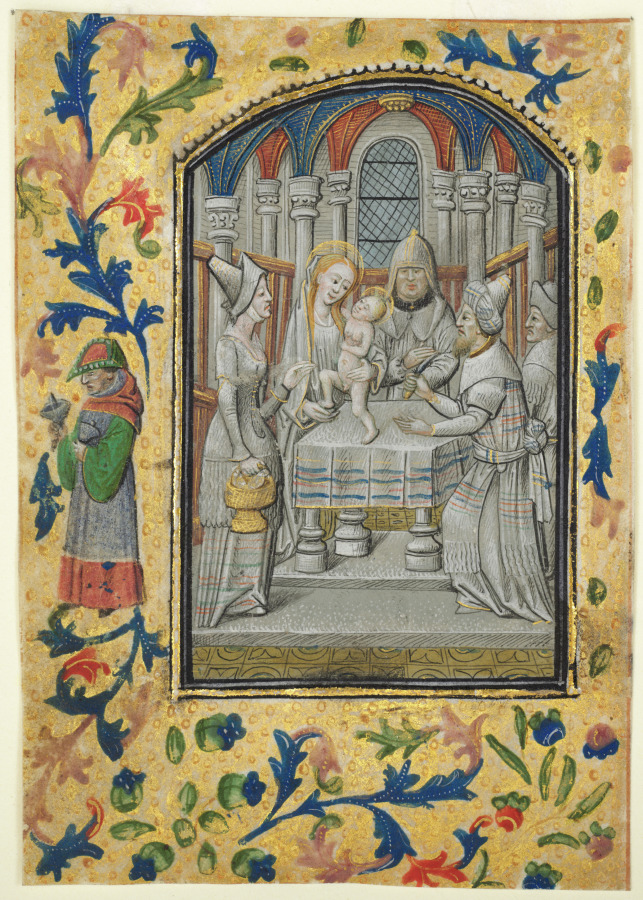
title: Leaf from a Book of Hours: Presentation in the Temple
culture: Flanders, Bruges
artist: Guillaume Vrelant (Flemish, c. 1454–1481)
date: c. 1470–1480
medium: tempera, liquid gold, and grisaille on vellum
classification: Manuscript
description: Guillaume Vrelant, born in Utrecht, was known to be in Bruges from 1454 onward where he died around 1481. He probably went there to sidestep a 1427 law which banned the sale of Utrecht images. A painter very much in vogue, he founded the Illuminators’ Guild in Bruges under the patronage of Saint John the Evangelist. He is known to have provided manuscripts to the Burgundian court.